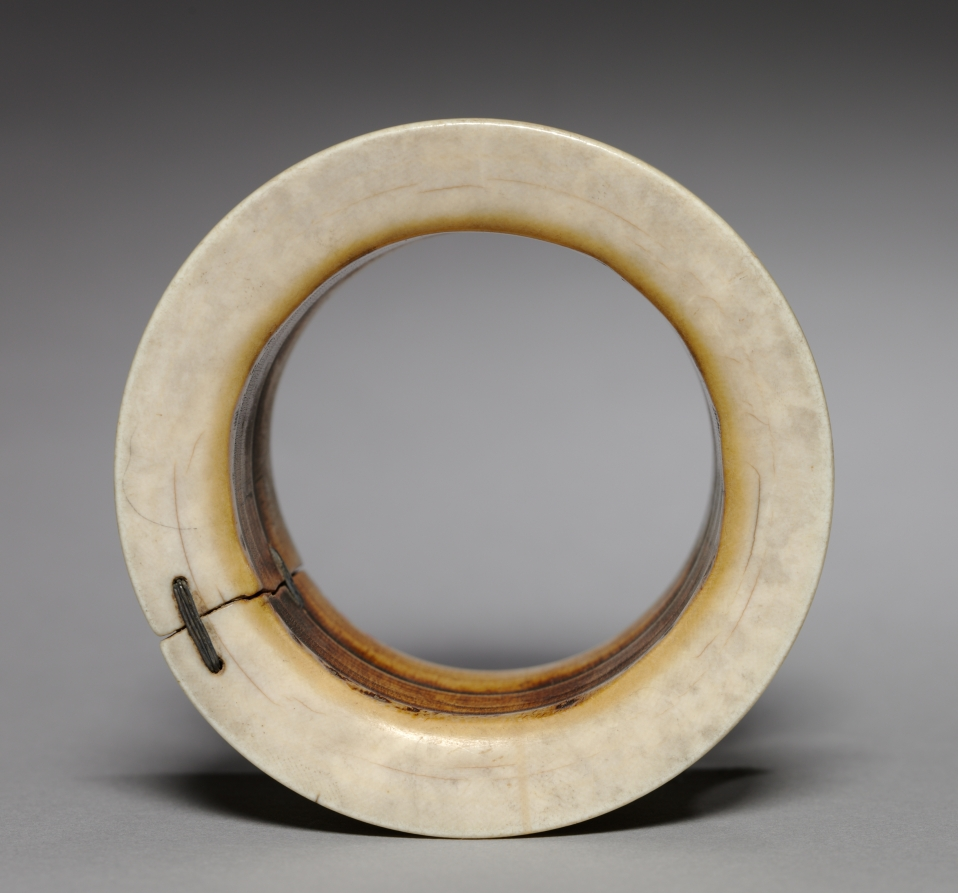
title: Bracelet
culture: Africa, Central Africa, Democratic Republic of the Congo, Kuba-style maker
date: c. 1900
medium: Ivory and wire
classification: Jewelry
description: This ivory bracelet is simple, yet elegant. Note how the delicate wire repair by a Kuba artisan adds a counterpoint pattern to the original design.